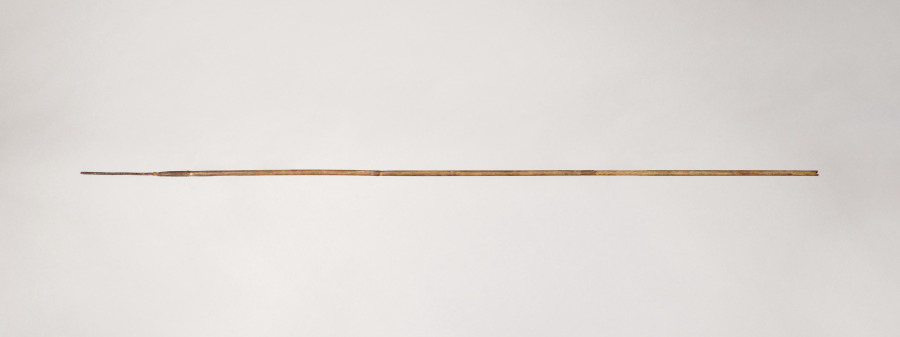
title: Arrow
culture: Philippines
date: before 1922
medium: bamboo shaft, wood tip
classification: Arms and Armor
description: This straight, lightweight arrow shaft is made from a single length of bamboo. Its surface is smooth and undecorated, with slight natural tapering toward the point. Shallow notches are cut at the rear end for attaching the bowstring.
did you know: The Aeta people typically used arrows like this one for hunting small game and birds.